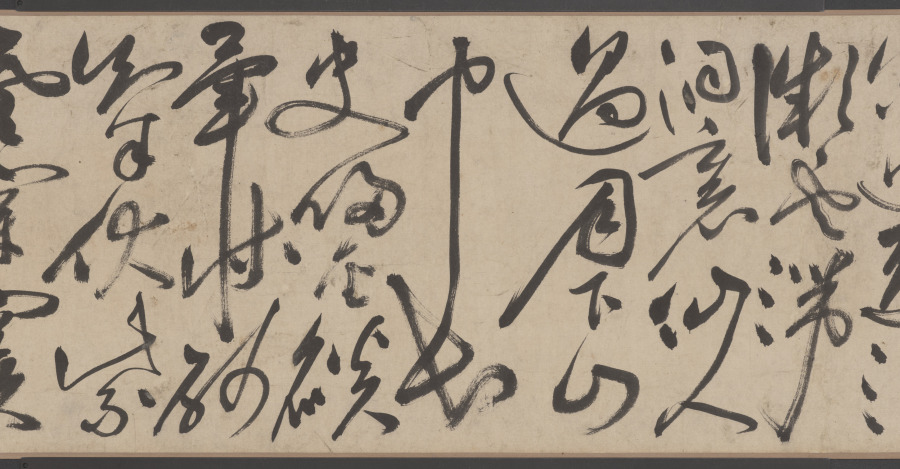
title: Retreat on an Autumn Day, in Cursive Script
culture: China, Ming dynasty (1368–1644)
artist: Zhu Yunming (Chinese, 1460–1527)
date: dated 1523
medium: Handscroll; ink on paper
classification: Calligraphy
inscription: 款識：讌於從一堂，爛漫醉書。癸未（1523）七月晦日也。枝山允明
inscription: 《閒居秋日》逃暑應能蹔閉關，未消多把古賢攀。並拋杯酌方為懶，少事篇章恐礙閑。風墮一庭鄰寺葉，雲開半面隔城山。浮生只說潛居易，隱比求（脫「名」）事更艱。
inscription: 《句曲道中》老至誰憐晝錦明，春來聊得客襟清。宵依星斗宮壇臥，曉（脫「入」）神仙宅舍行。眼看山多城郭少，肩挑詩重簿書輕。何時總入煙霞去。不見人間寵辱驚。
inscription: 《登茆峰》下馬門前一振衣，翠微高迥逼清微。雲端洞裡仙人過，月下山中長史歸。金焰暈牀砂氣伏，紫雲穿竇朮芽肥。神方能詠不能遇，一夜爽靈峰外飛。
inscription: 鈐印：「晞哲」、「允明」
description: This masterwork of calligraphy by Zhu Yunming from Suzhou combines two poems by the artist in cursive script style, characterized by its uninhibited, swift, and intuitive brushwork, so powerful that it here dissolved characters into dots or lines. Written from right to left and top to bottom and alternating in light dry to deep saturated ink, single characters may take a whole column or extend into the next one. Following the movement of the brush, they seem to dance over the paper.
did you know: Zhu Yunming stated that he was in an inebriated state when he created this work.